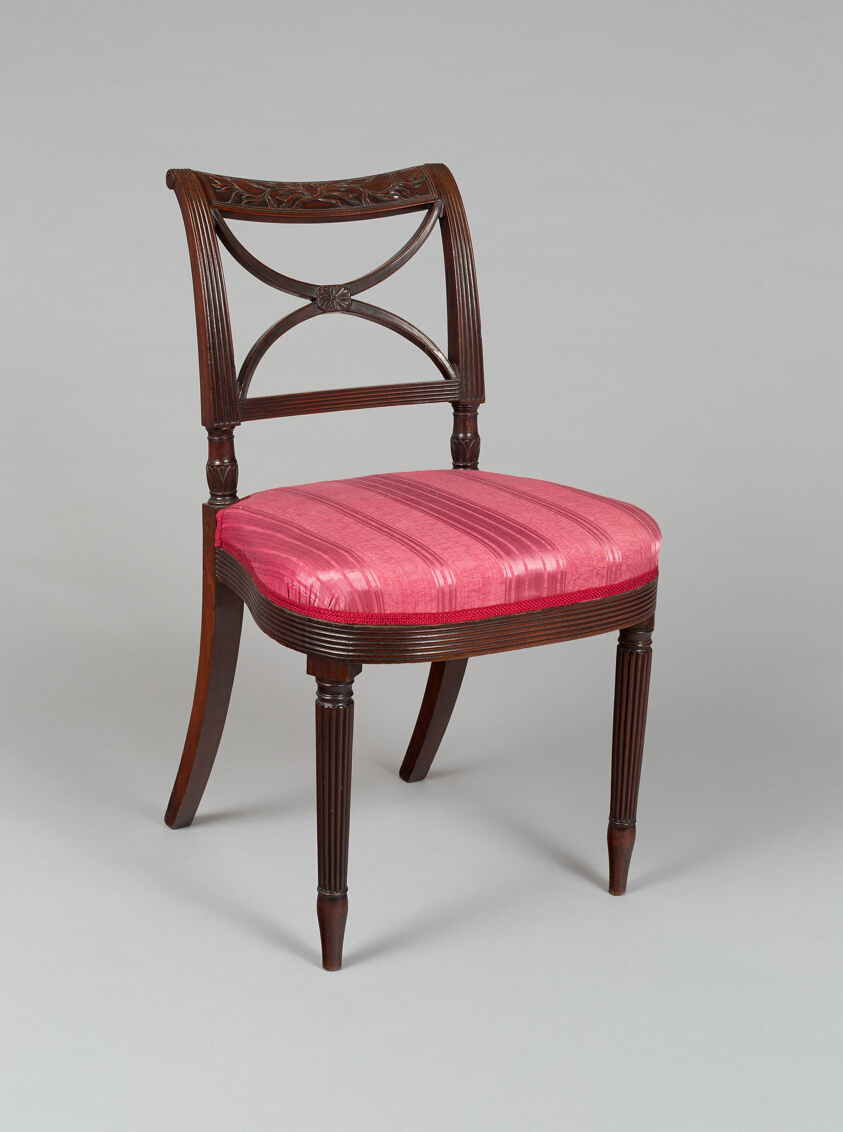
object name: Furniture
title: Side Chair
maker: Artist unknown (American, 19th century); New York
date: 1805–12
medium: Mahogany, ash, cherry, white pine, and upholstery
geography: New York City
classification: seating; furniture; american decorative arts; american arts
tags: furniture